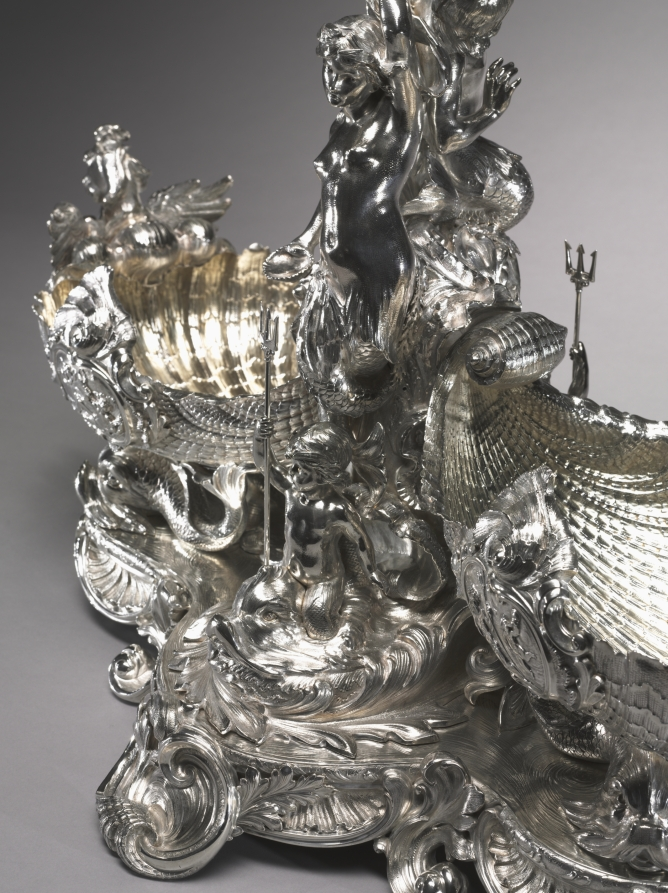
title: Centerpiece from the Nereid Service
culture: England, late 19th-early 20th century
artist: Goldsmith's & Silversmith's Company (British)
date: c. 1900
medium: silver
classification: Silver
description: Originally thought to have been made by the early 19th-century London silversmith Paul Storr because it had been marked with spurious Storr hallmarks, more recent scholarship has revealed that this service, representing the triumph of Great Britain on the high seas through the allegorical images of Grecian nymphs (nereids), was actually made to display at the 1900 world's fair in Paris. Such nationalistic fervor permeated design at the turn of the 20th century, especially in the years leading up to the First World War, when national pride was brought to its heels in Europe through a devastating conflict.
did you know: This centerpiece is actually the product of many hands since the Goldsmiths' and Silversmiths' Company operated as a cooperative of silversmiths who sold their work through the company.